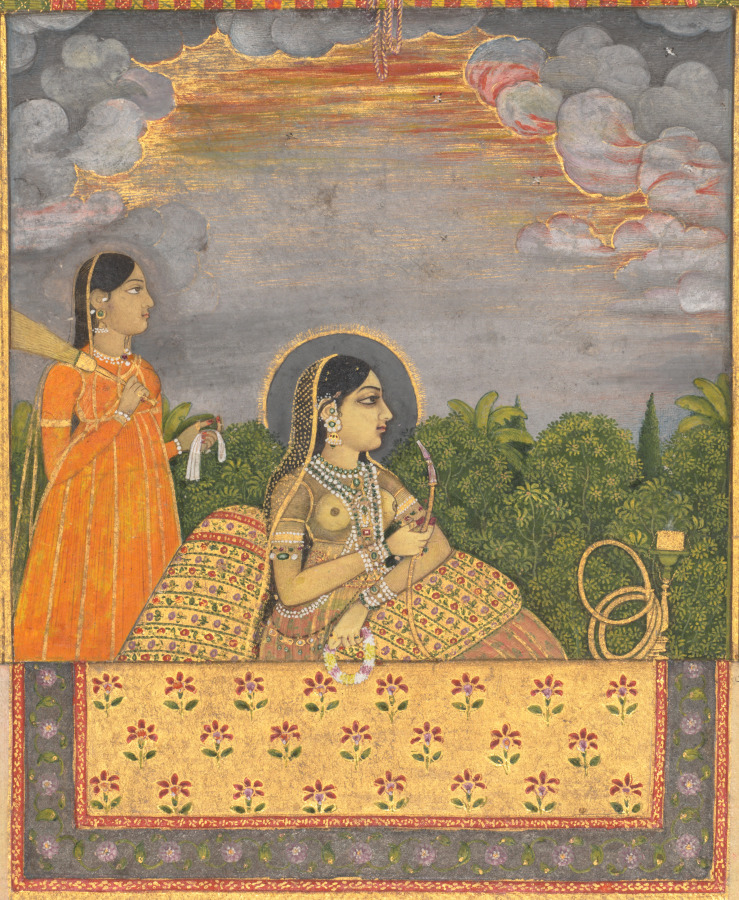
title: Princess and attendant in trompe l’oeil window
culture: Mughal India, Uttar Pradesh, Lucknow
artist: Aqil Khan (Indian, active mid-1700s)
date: c. 1765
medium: Gum tempera, ink, and gold on paper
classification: Painting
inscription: 'amal 'Aqil Khān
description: A golden window shade has been rolled up to reveal a princess seated on a terrace. The carpet draped over the sill echoes that of the balcony rail where royals would show themselves to the public. Rather than taking the view of an outsider, the viewer looks from inside the palace out to the women and the wooded landscape beyond. During the mid-1600s, the Mughal court introduced a preference for the patterns on carpets and textiles: flowering plants on a plain ground. This influential fashion derived from their appreciation of European botanical studies that merchants and diplomats brought to India.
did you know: Unlike in portraits of the emperor, women sit on the outside of the royal window.